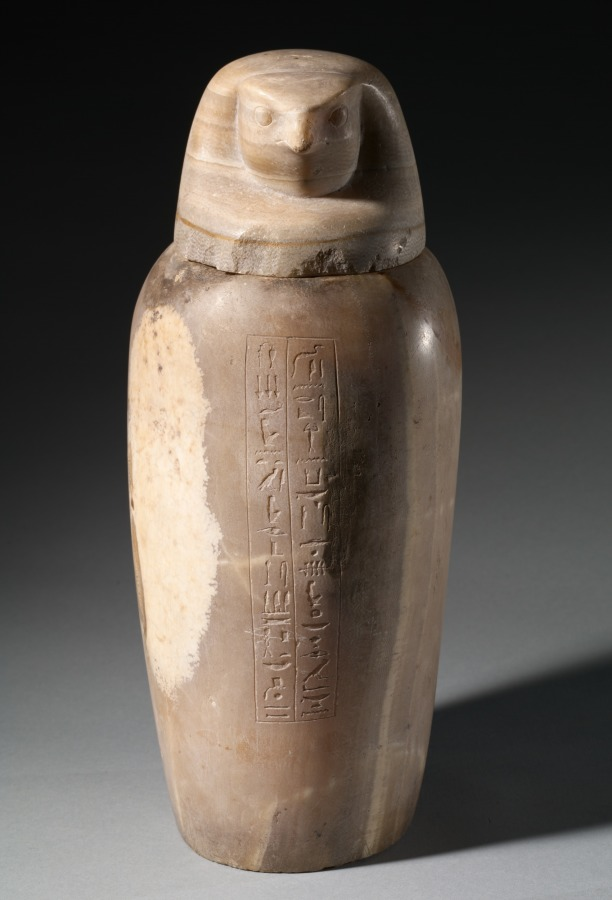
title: Canopic Jar with Falcon's Head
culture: Egypt, Late period (715–332 BCE), Dynasty 26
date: 664–525 BCE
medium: travertine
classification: Funerary Equipment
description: In the process of mummification, the liver, lungs, stomach, and intestines were removed, separately embalmed, and stored in specialized jars known as canopic jars (after a sailor in Greek mythology, who died at the town of Canopus in the Nile Delta and was worshipped there in the form of a human-headed jar). Each organ was identified with one of four funerary deities collectively known as the Sons of Horus: the liver with Imsety (man's head), the lungs with Hapy (baboon's head), the stomach with Duamutef (jackal's head), and the intestines with Qebehsenuef (falcon's head). It was their duty to protect the deceased and restore to him his body parts in the hereafter.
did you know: The falcon-headed deity Qebehsenuef protected the contents of this canopic jar. It contained the remains of the deceased's intestines, which were kept safe for the afterlife.